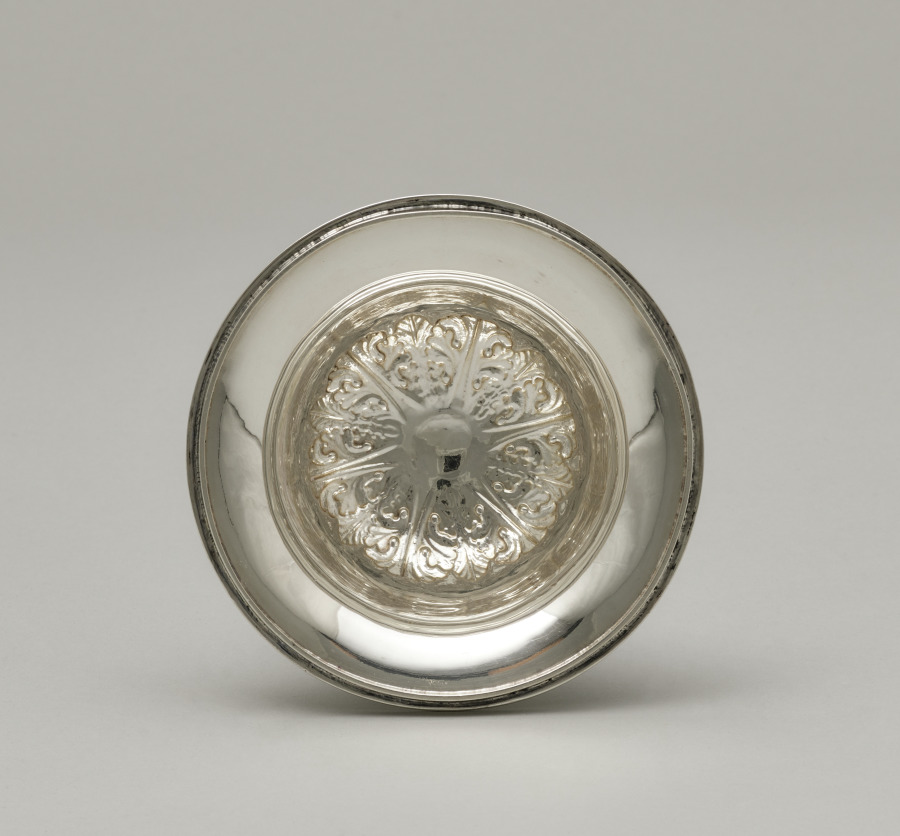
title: Tea Urn with Cover (lid)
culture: America, Pennsylvania, Philadelphia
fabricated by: Harvey Lewis (American, 1835)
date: 1811–25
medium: silver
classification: Silver